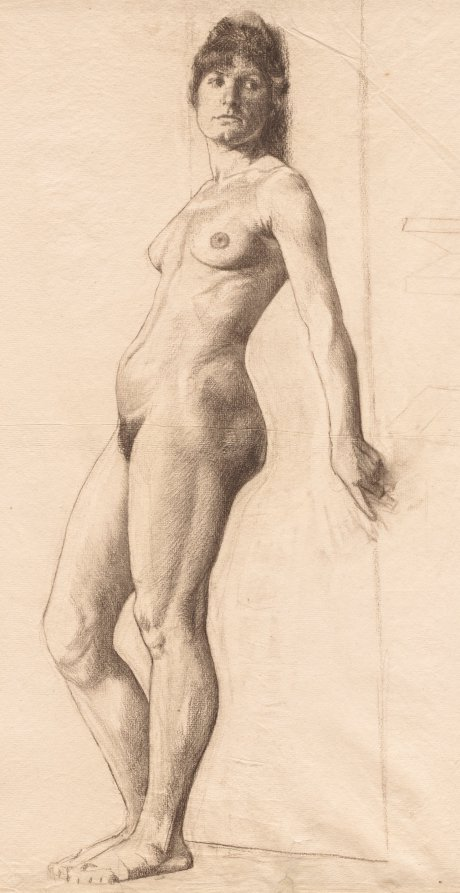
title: Standing Nude Model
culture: America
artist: Otto H. Bacher (American, 1856–1909)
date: probably 1878–79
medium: charcoal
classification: Drawing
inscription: Watermark: E D & Cie (in cartouche)